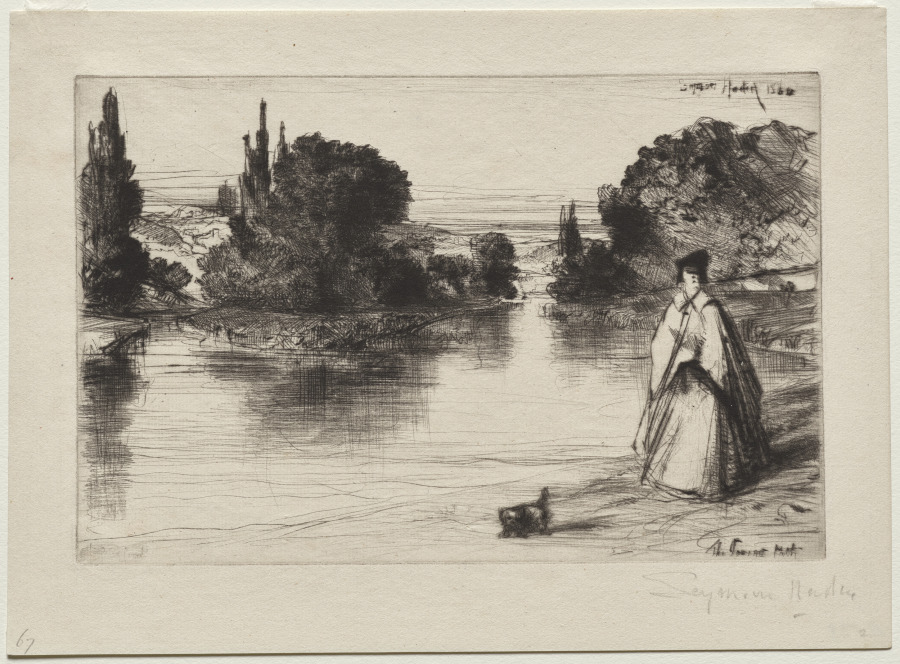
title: Towing Path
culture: England, 19th century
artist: Francis Seymour Haden (British, 1818–1910)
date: 1864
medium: drypoint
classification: Print